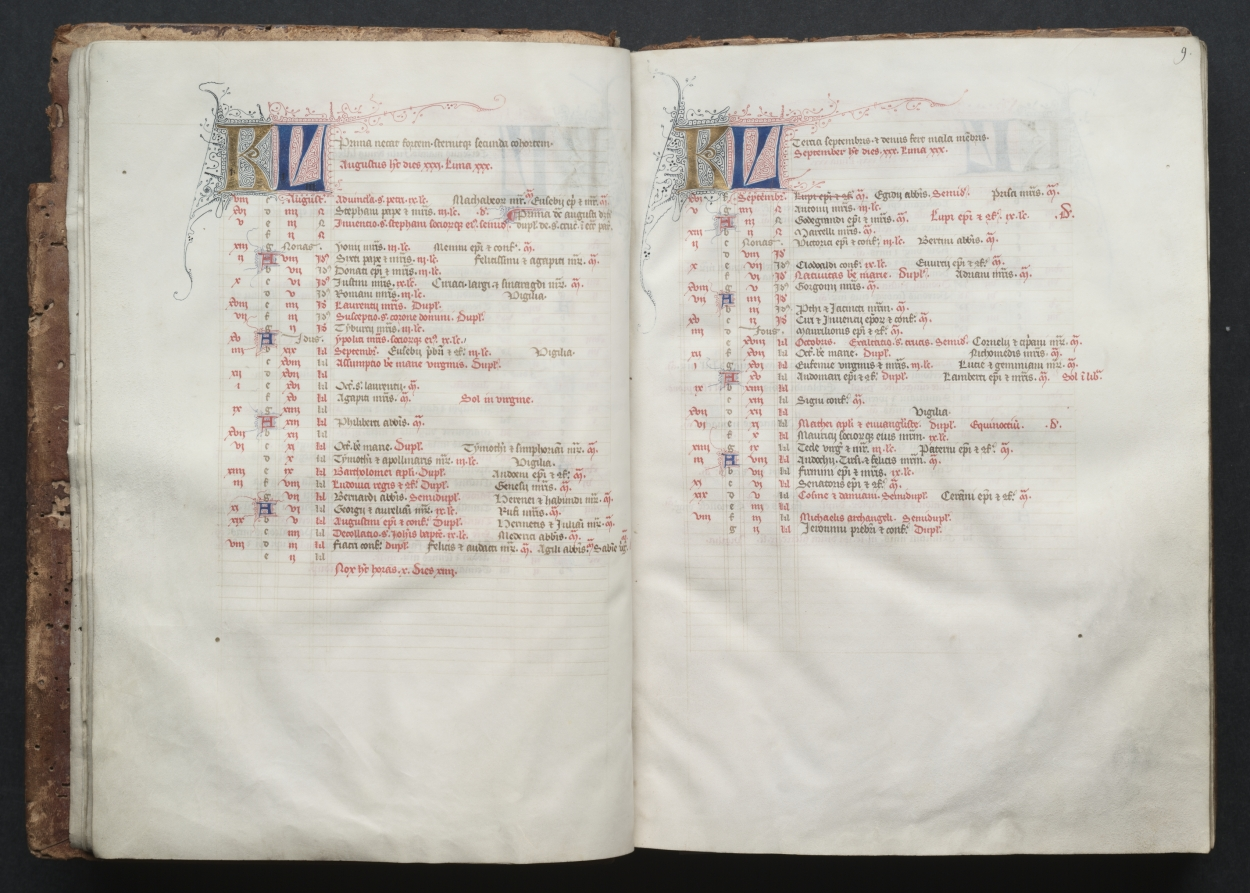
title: The Gotha Missal: Fol. 8v, Text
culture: France, Paris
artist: Master of the Boqueteaux (French)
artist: and Workshop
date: c. 1375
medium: ink, tempera, and gold on vellum; blind-tooled leather binding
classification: Bound Volume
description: The style and quality of this manuscript's decoration is typical of deluxe Parisian books made for aristocratic or royal patrons. Most of the book's decoration appears to be the work of the Master of the Boqueteaux, an artist active at the court of King Charles V (died 1380). His style was apparently shared by a number of book illuminators working in and around Paris. It is very possible that the Gotha Missal belonged to Charles V, but is not provable because the manuscript has no royal portraits and lacks a colophon. Given the book's magnificent decoration, however, it would seem that it was produced for a Valois prince, if not for the king himself. The manuscript receives its name from the German dukes of Gotha, its later owners.